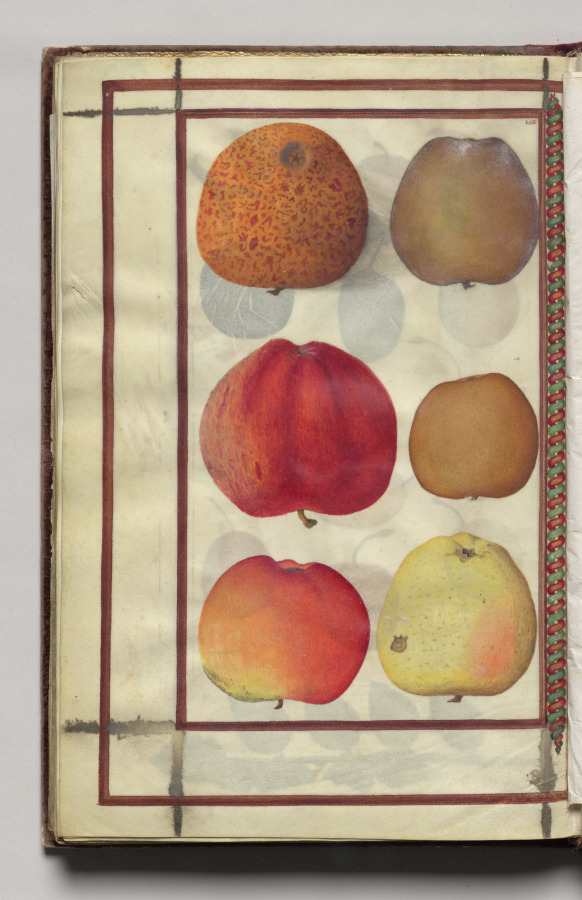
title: Apples, folio 48 (verso), from Florilegium (A Book of Flower Studies)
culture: France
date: 1608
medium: watercolor, ink, silver, and gold over occasional traces of pencil, on vellum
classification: Bound Volume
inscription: Dated: Poitiers 1608 (on frontispiece) Signed: On frontispiece in black ink, lower right: Van Kuyk Notation on drawing: Frontispiece: in pencil, lower margin: * élève de Van Kessel, peintre flammand (* in pencil also appears in front of Van Kuyk's name).